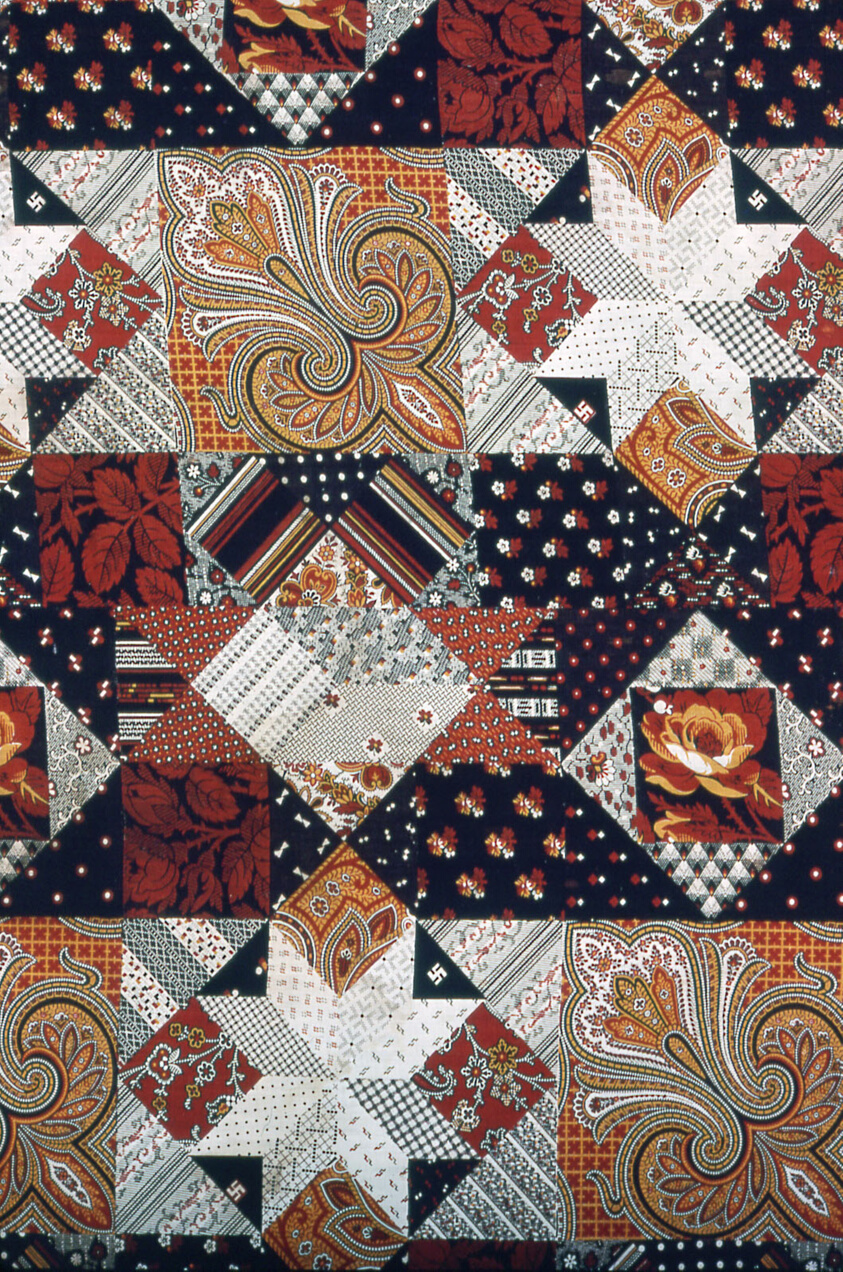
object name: Textile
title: Panel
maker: Produced by Cocheco Cotton Manufacturing Company, founded 1812; United States, New Hampshire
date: 1825/75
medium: Cotton, plain weave; roller printed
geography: New Hampshire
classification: textile; weaving - printed; printed textile